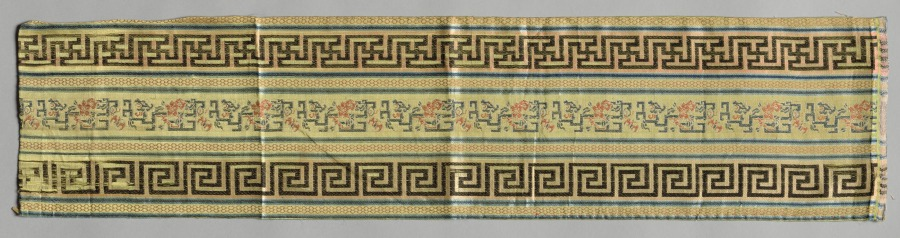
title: Border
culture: China, 19th century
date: 1800s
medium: silk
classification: Textile